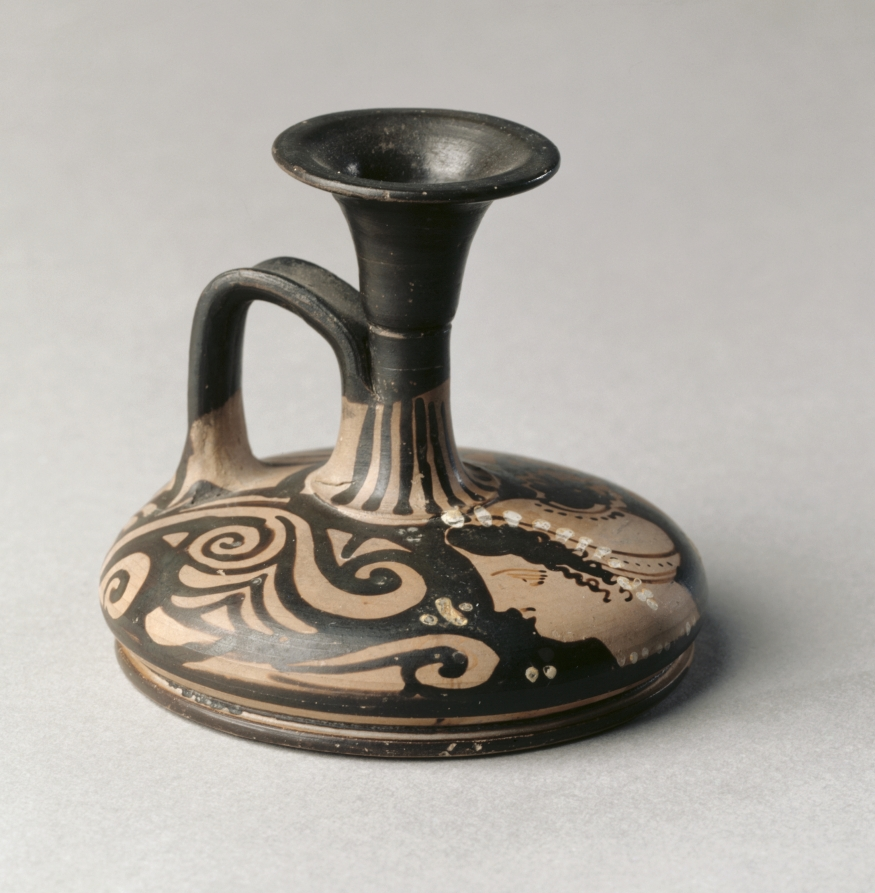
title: Red-Figure Squat Lekythos (Oil Vessel): Female Head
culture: South Italian, Apulian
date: 350–300 BCE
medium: ceramic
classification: Ceramic